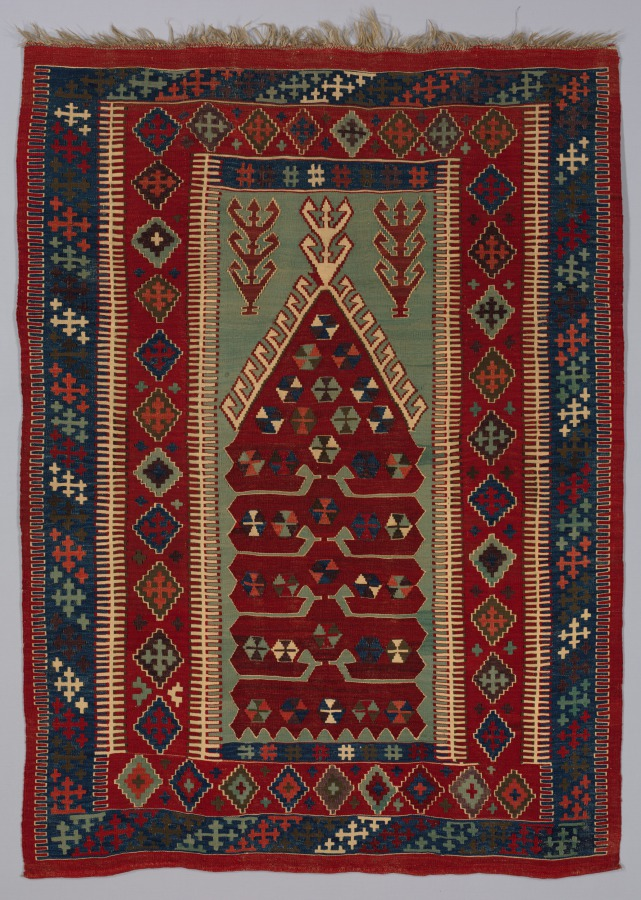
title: Carpet (Kilim)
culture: Turkey, Anatolia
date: late 19th-early 20th century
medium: tapestry weave: wool and cotton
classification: Carpet